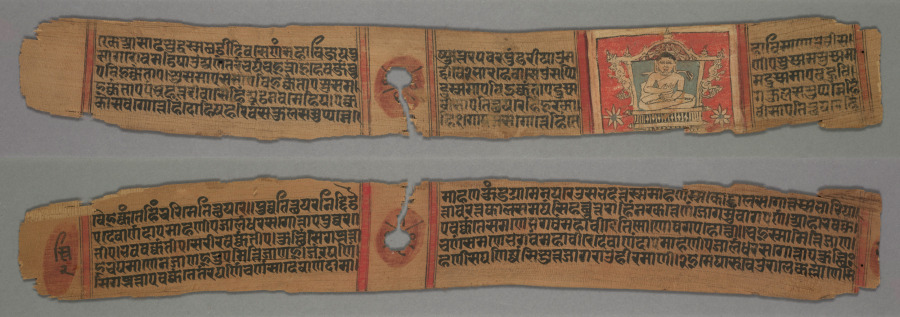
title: Folio 2, from a Kalpa-sutra and Story of Kalakacharya of Devachandra: Enthroned Monk Gautama (recto); Text (verso)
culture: Western India, Gujarat, Patan (Anahillapura), reign of King Sarangadeva of the Vaghela dynasty (1275-1297)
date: 1279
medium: gum tempera and ink on palm leaf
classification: Painting